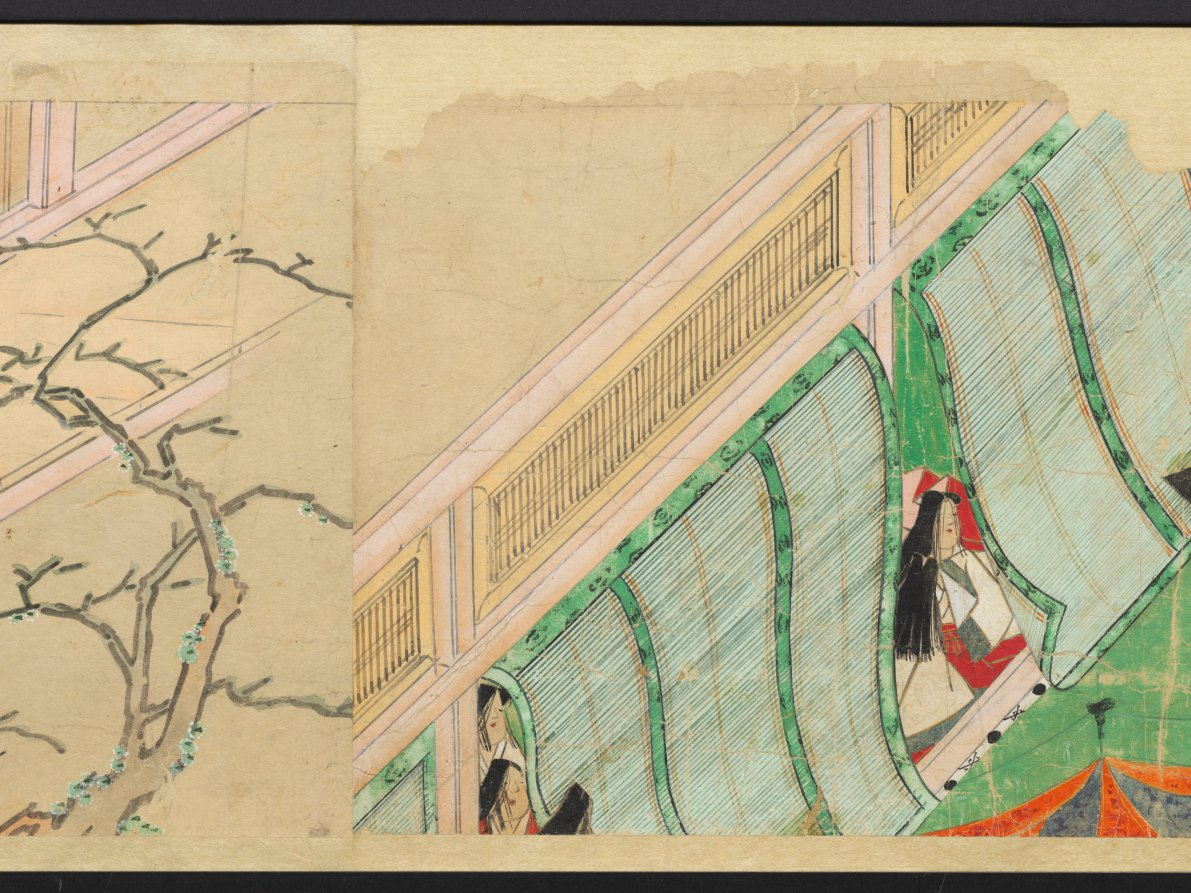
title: The Saltmaker's Story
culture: Japan, Edo period (1615–1868)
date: early 1600s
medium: One of a pair of handscrolls; ink, color, and gold on paper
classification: Painting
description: Once read and copied by girls at New Year’s celebrations and included in dowries, The Saltmaker’s Story is a rags-to-riches tale in which daughters are gifts from the gods. Despite his simple outlook, the main character progresses from humble roots as an associate at Kashima Shrine to the elite status of grandfather of the emperor through the intervention of the Kashima deity. The Saltmaker’s Story is traditionally presented in a set of three scrolls, but the text of this set has been removed by a previous owner, who remounted the illustrations as a pair. The paintings of this one take us from right to left through the second half of the tale.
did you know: This handscroll originally had texts before its paintings, but the texts were removed.